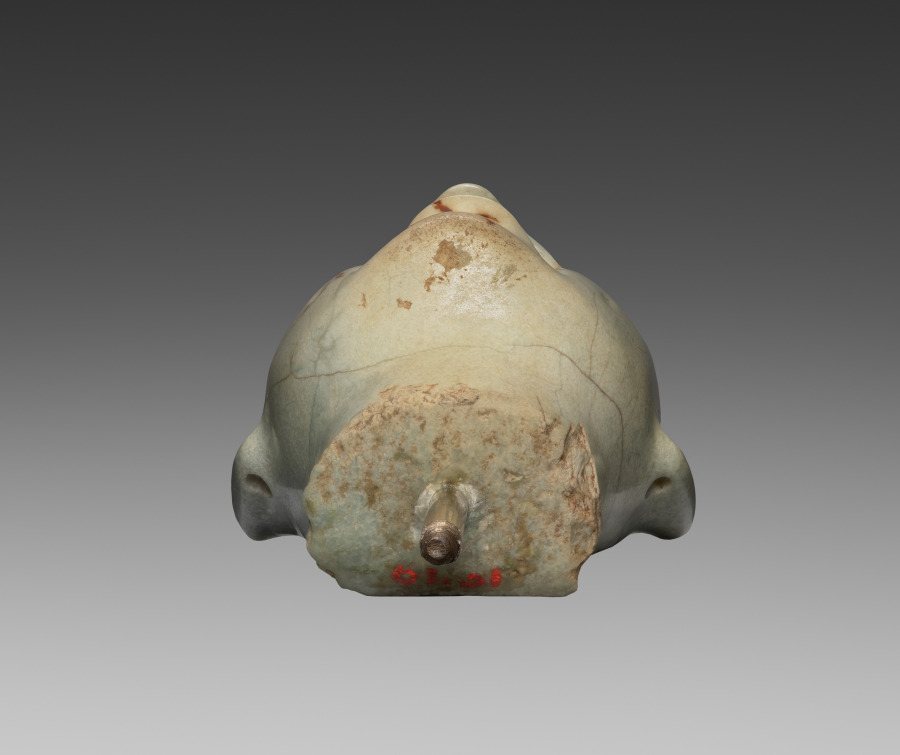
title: Head Fragment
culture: Mesoamerica, Mexico, Olmec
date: c. 900–300 BCE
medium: jadeite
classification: Jade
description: This sensual head fragment may come from a seated or standing figure like those shown nearby, though much larger. The carving is exceptionally fine, from the slight under-eye puffiness to the delineation of the fleshy lips and the teeth. The profile face of supernatural being is incised just in front of each ear, perhaps indicating that the subject had special power.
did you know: In ancient Mesoamerica, jade was more valuable than gold.